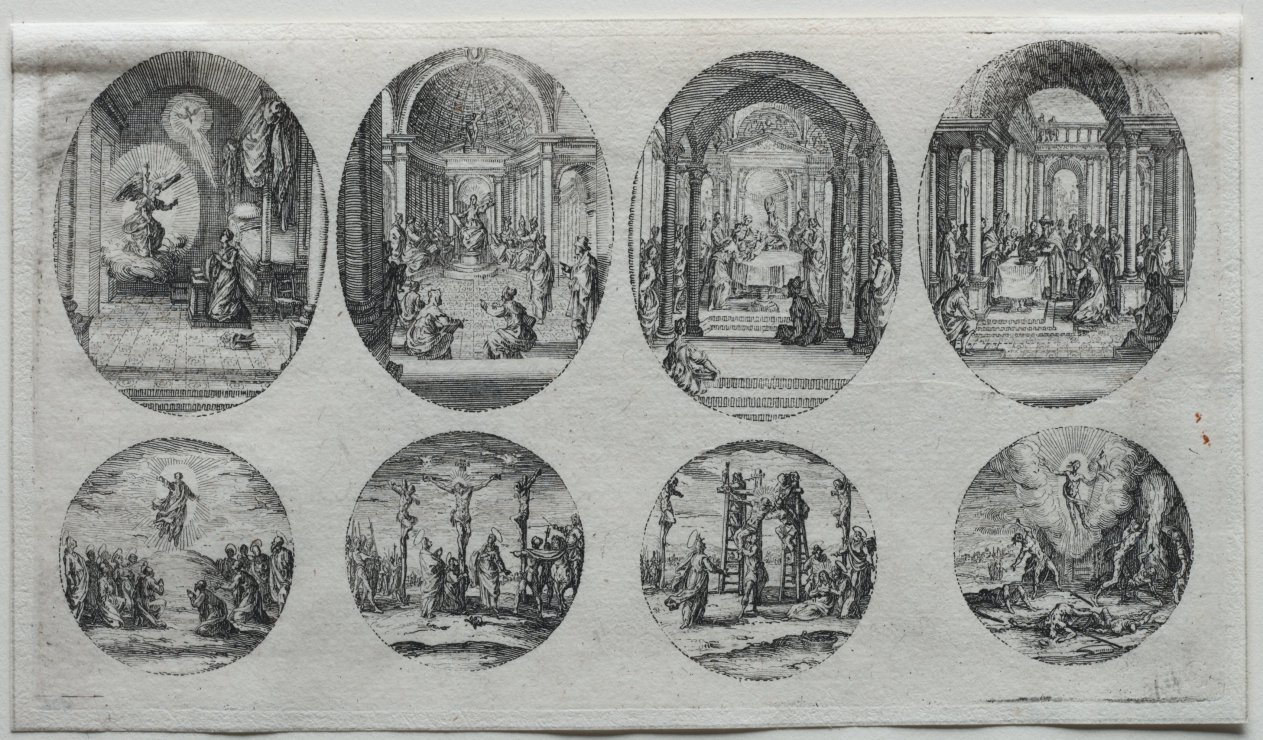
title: The Mysteries of the Passion: The Transfiguration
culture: France, 17th century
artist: Jacques Callot (French, 1592–1635)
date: 1631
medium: etching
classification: Print